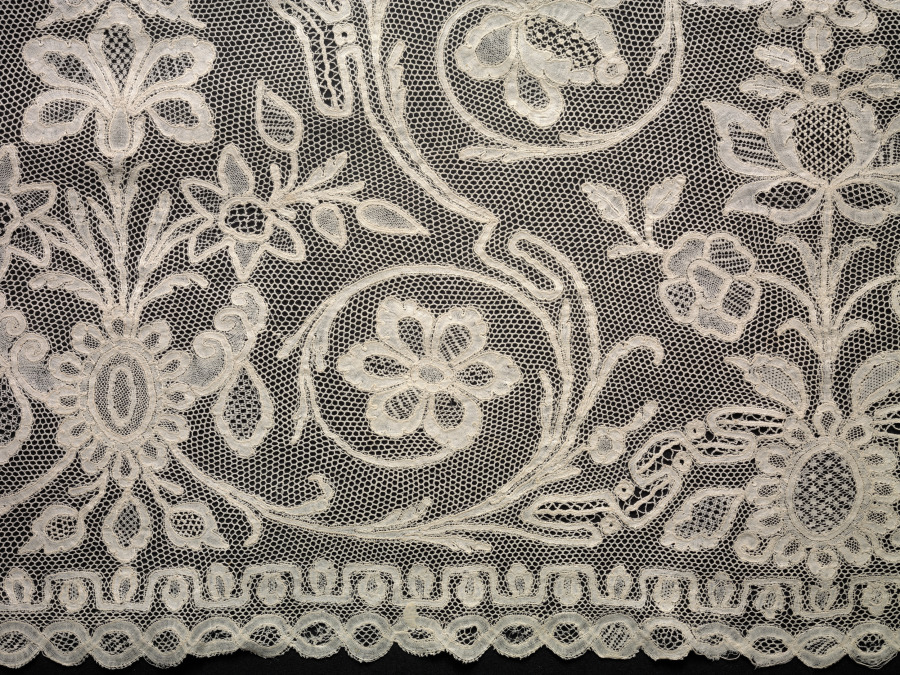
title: Lace Flounce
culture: Belgium, Brussels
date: 1600s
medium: Linen: bobbin lace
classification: Lace